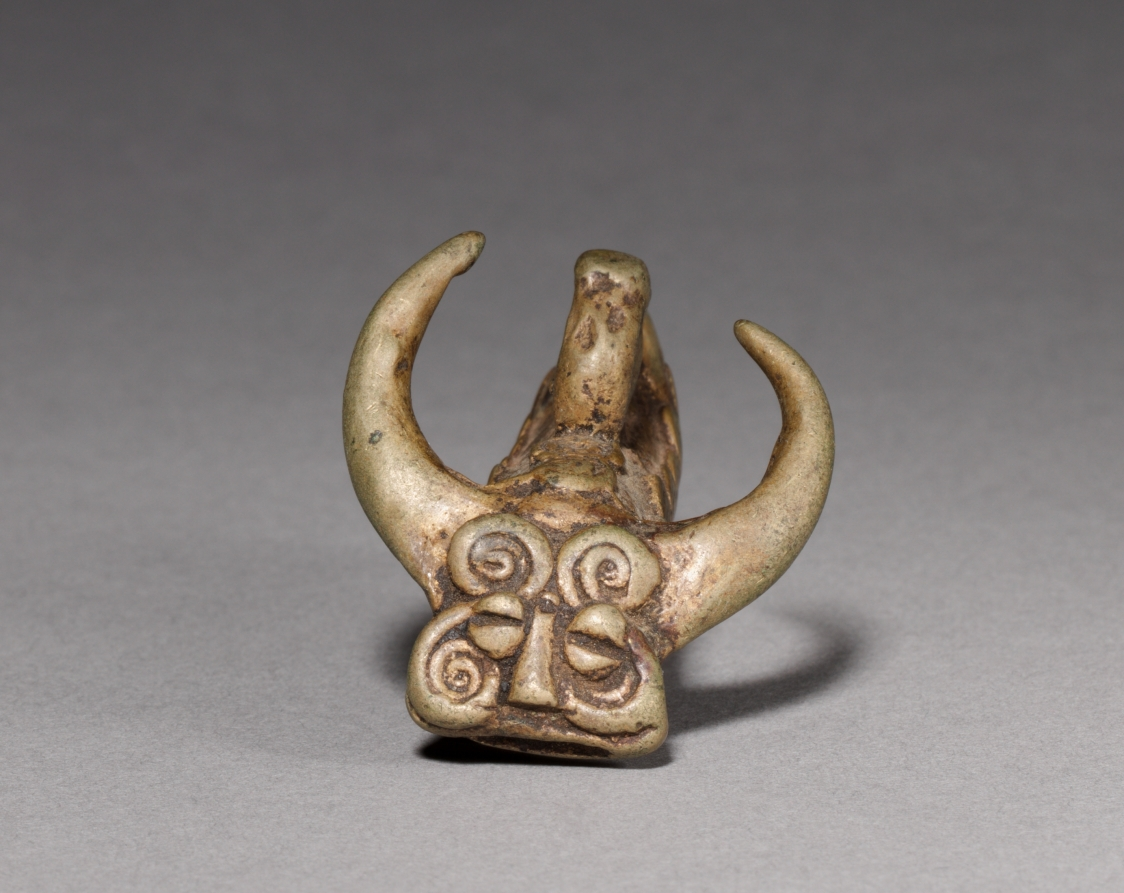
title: Animal Pendant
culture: Western Sudan, Burkina Faso, Tusyan, 20th century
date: 1900s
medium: Copper alloy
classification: Jewelry